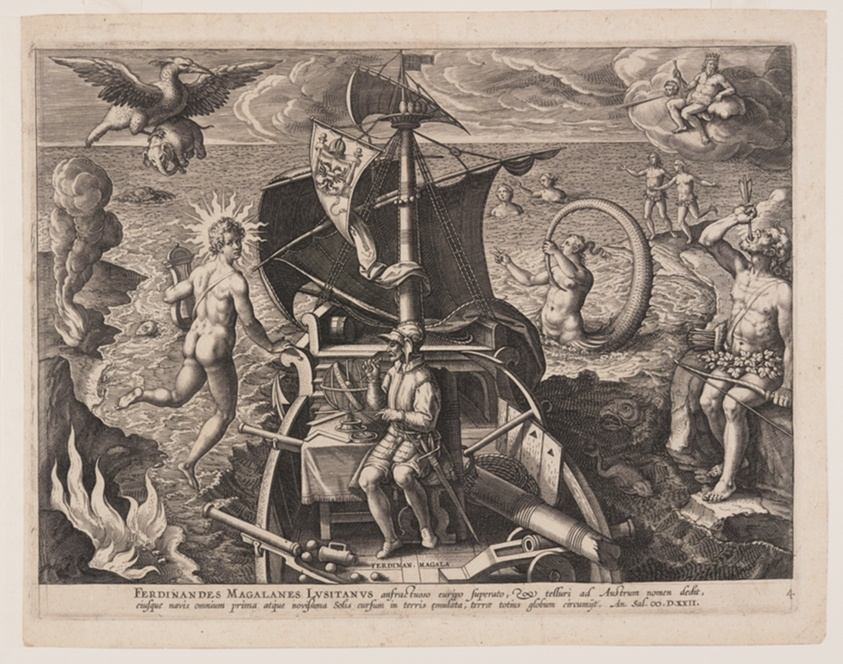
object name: Print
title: Magellan Seated on Deck, from Americae Retectio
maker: Adriaen Collaert (Flemish, c. 1560–1618); after Jan van der Straet (Flemish 1523–1605)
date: c. 1589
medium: Engraving on ivory laid paper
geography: Flanders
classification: engraving; paper; print; prints and drawing